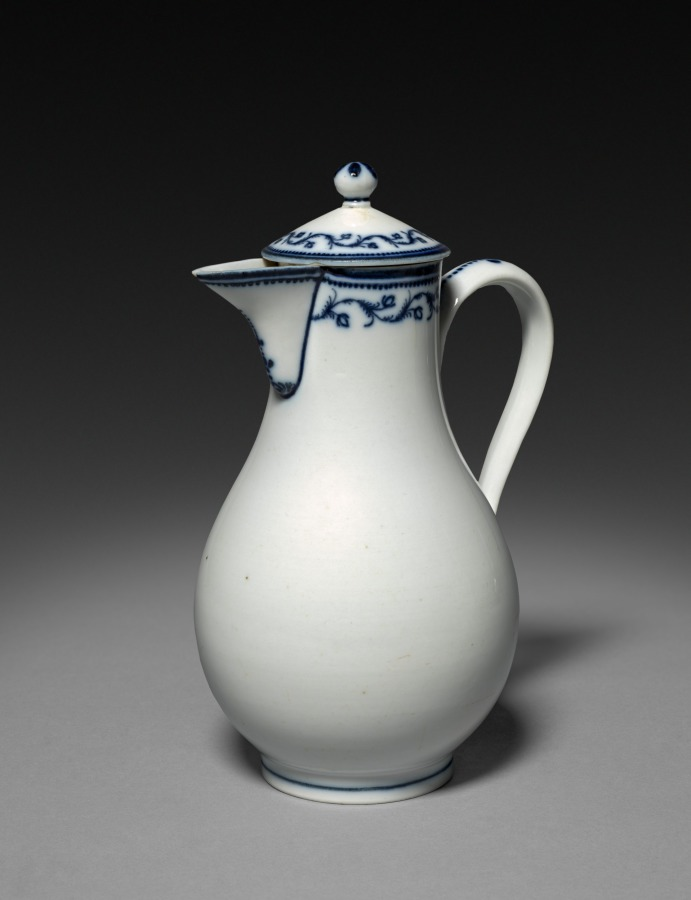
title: Pitcher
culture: France, 18th century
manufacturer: Niderviller Factory (French)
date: c. 1780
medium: hard-paste porcelain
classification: Ceramic